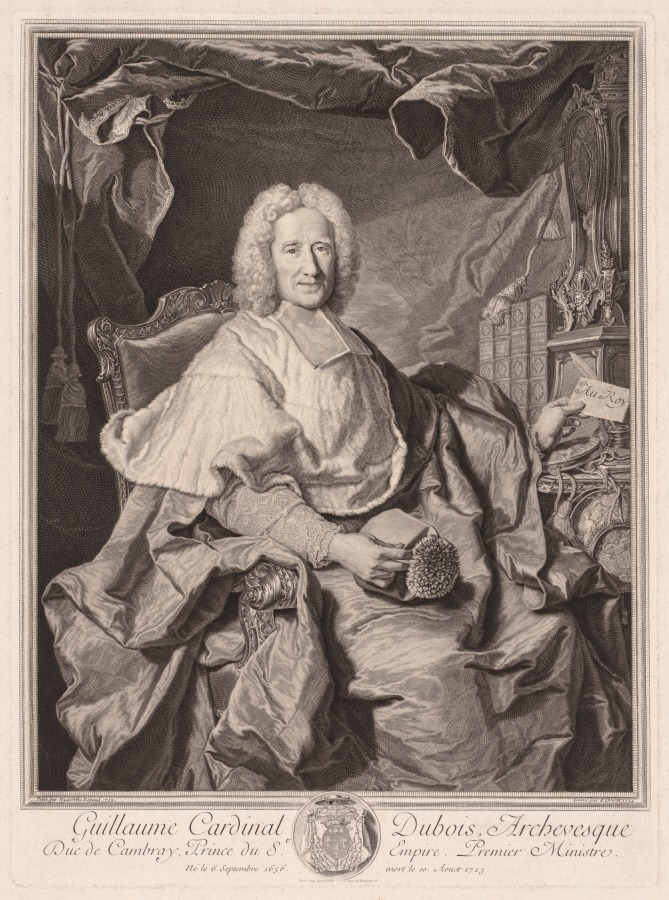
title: Cardinal Dubois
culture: France, 18th century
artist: Pierre-Imbert Drevet (French, 1697–1739)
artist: after Hyacinthe Rigaud (French, 1659–1743)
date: 1724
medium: engraving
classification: Print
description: One of the most powerful people in France at the beginning of the 18th century, Cardinal Guillaume Dubois (1656–1723) holds a letter addressed Au Roy, or “To the King.” The engraving reproduces a painting commemorating Louis XV’s ascendance to the throne in 1723.